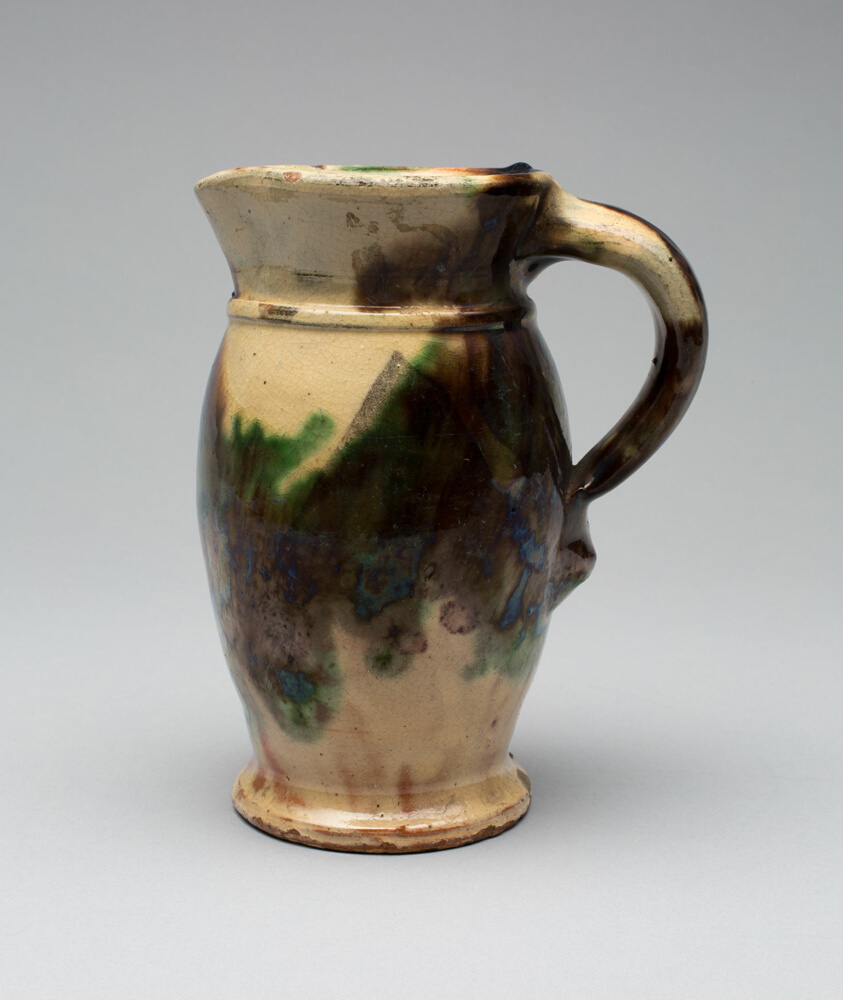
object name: Decorative Arts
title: Pitcher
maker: Attributed to S. Bell & Son; American, c. 1882–1908; Strasburg, Virginia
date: 1887–1900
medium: Earthenware, with cream slip embellished with lead glazes colored with copper and manganese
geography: Strasburg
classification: pitcher (vessel); earthenware; vessel; ceramics; american decorative arts; american arts; decorative arts